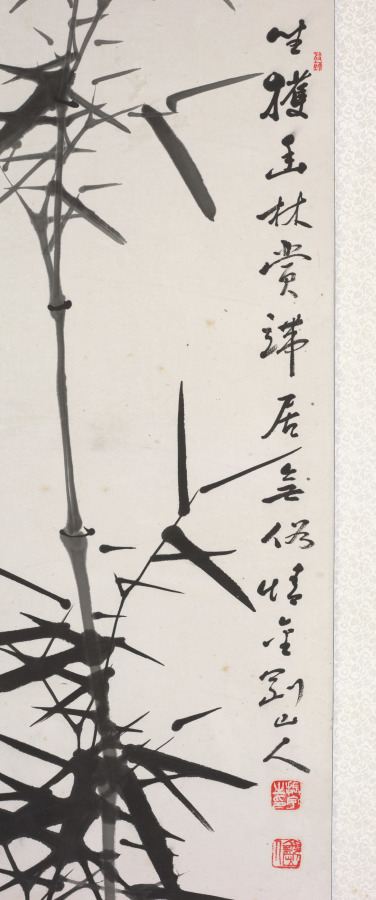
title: Bamboos in Wind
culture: Korea, Japanese colonial period (1910−1945)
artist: Kim Jin-woo (Korean, 1883–1950)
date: 1934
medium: Ten-panel folding screen; ink on paper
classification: Painting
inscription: Two chops stamped on each panel: 振宇之印 (Jinwoo’s Seal); 金剛山人 (Diamond Mountain Man)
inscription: Inscription written on the far-left panel: 甲戌流??寫於竹林堂金剛山人振宇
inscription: Inscription written on the 8th panel: 五百間淸風金剛山人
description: Active during the Japanese colonial period in Korea (1910–45), the artist Jin-woo Kim earned his artistic reputation for his expressive renditions of bamboo swaying in a strong wind. His piercing bamboo shoots are often compared to an iron spear, and their sharp leaves to a knife. It is believed that he deliberately emphasized sharpness in his brushstrokes to express his strong resistance against Japanese colonial oppression.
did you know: The artist’s prolific artistic production were a major part of fundraising efforts to support resistance activities for Korea’s independence.